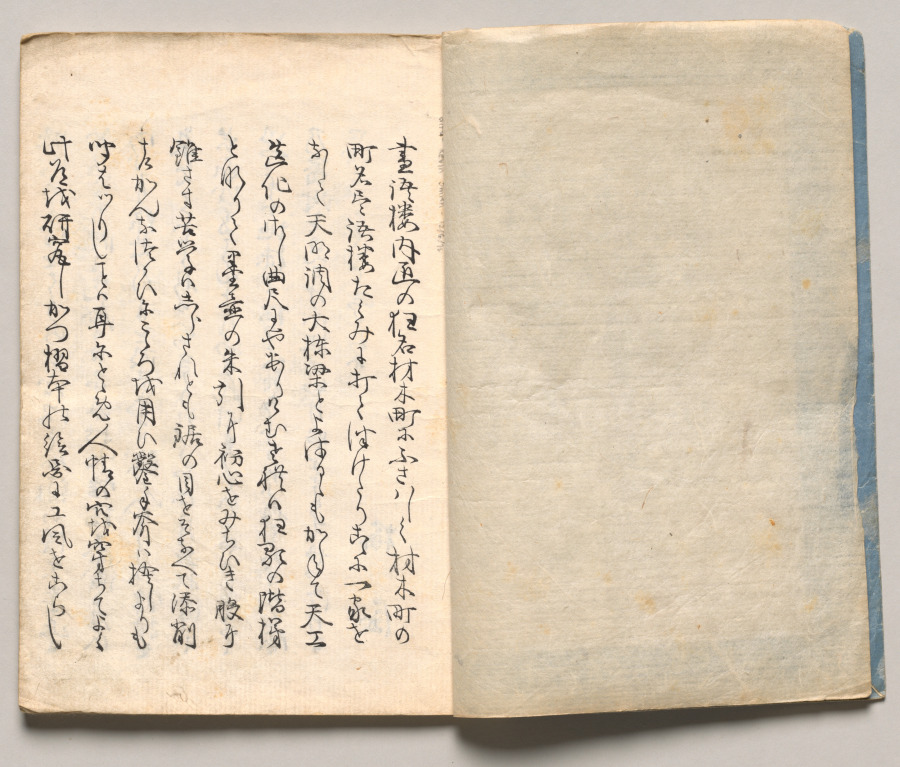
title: Spread One from Volume One of People of Japan in Light Verse (Kyōka)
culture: Japan, Edo period (1615–1868)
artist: Utagawa Hiroshige (Japanese, 1797–1858)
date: 1857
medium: Woodblock-printed book; ink and color on paper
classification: Bound Volume